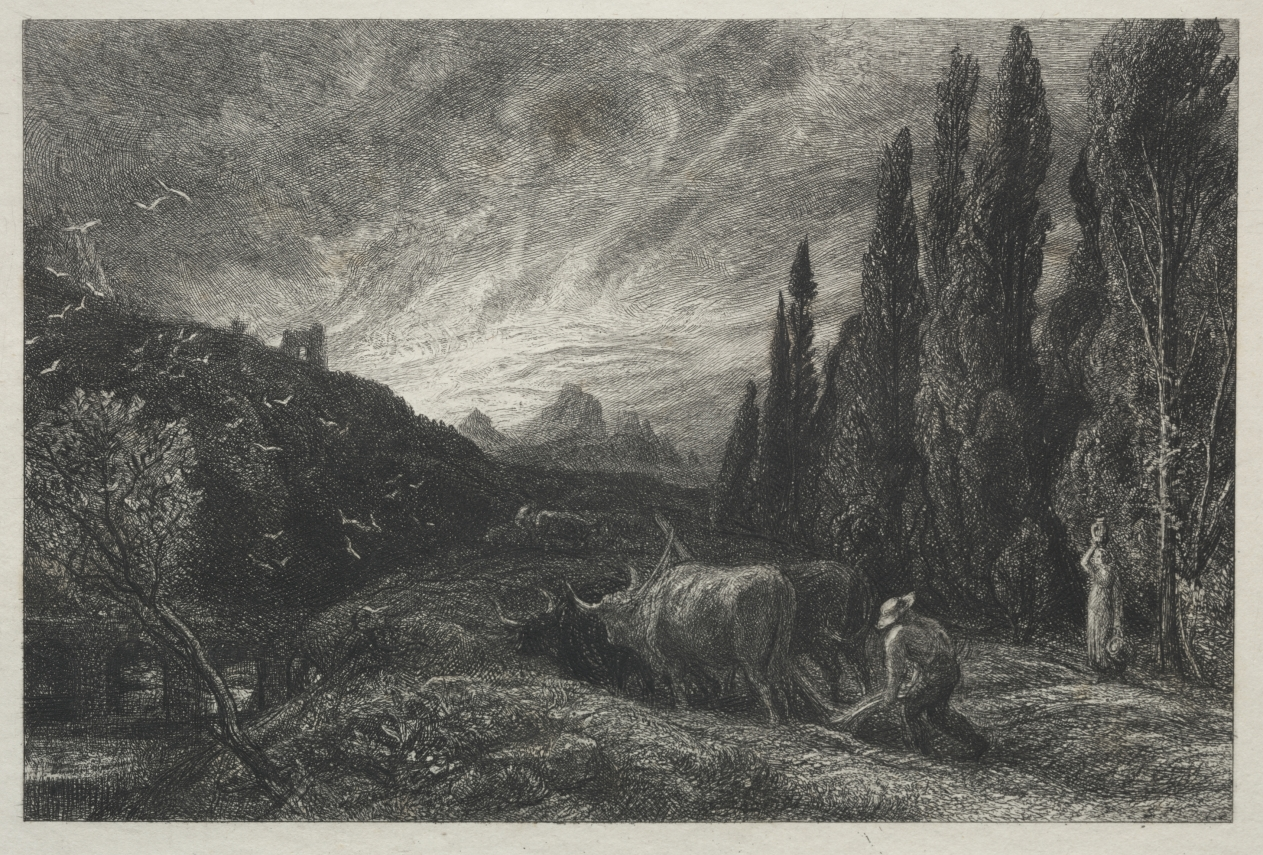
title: The Early Plowman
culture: England, 19th century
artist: Samuel Palmer (British, 1805–1881)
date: c. 1861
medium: etching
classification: Print